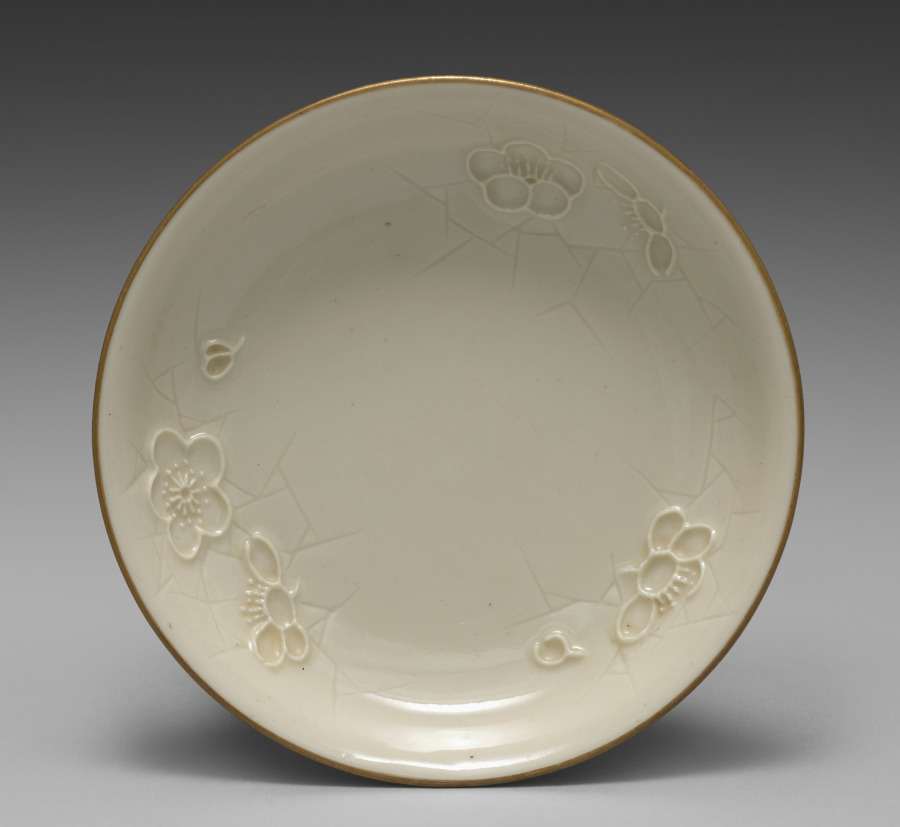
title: Small Dish from Dining Set with Plum Blossoms and Cracked-Ice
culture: Japan, Meiji period (1868–1912)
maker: Seifū Yohei II (Japanese, 1844–1878)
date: c. 1875–78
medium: Porcelain with molded designs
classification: Ceramic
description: Each item in this set has a delicate low-relief design of flowering plum branches over scattered, intersecting lines meant to resemble the cracked-ice surface of a frozen body of water and is signed on the base in gold pigment. While Yohei II produced many fine works in underglaze blue, like those produced by Kiyomizu Shichibei, he also made works in quite different styles later in his career, from the early 1870 s. In 1873, he was appointed purveyor to the Industrial Center of Kyoto Prefecture, a designation associated with Kyoto’s efforts to reach an international market through the port of Kobe; and from 1875 until his death, he was involved in national-level projects to present Japanese ceramics across the world. It was during this period that Yohei III was apprenticed to Yohei II, and it has been suggested that this set may in fact be an early example of Yohei III’s work, which he signed with his teacher’s name. Decorated with flowers resembling Japanese textile motifs, the set calls to mind the design of Yohei II’s pair of vases with plum blossoms in the Victoria and Albert Museum. Here, the elaborate trees created for a formal public exhibition setting have been translated into the approachable blossoms of the genteel domestic environment. While the designs are consistent across the pieces, each raised flower petal and pistil and each incised line in the ice was done by hand, so the cups, bowls, and dishes are similar yet unique. The bottoms of two boxes once identified the set’s owner, but the information has been deliberately obscured with black ink. However, inscriptions still visible appear to indicate two occasions, once at the end of July 1886 , and once again in June 1916 , when parts of the set were requested from Hokura in Niigata Prefecture. The location corresponds to a neighborhood in the present-day city of Jōetsu. The surname Tsuji 辻 also appears on a paper tag affixed to one of the box cloths. Future research may possibly reveal more about their provenance. A vase by Yohei III in a private collection combines the formal grandeur of the Yohei II vases in the Victoria and Albert Museum with the gentler design of this dining set, placing flowering plum trees against soft, scalloped-edge clouds resembling those in golden screens.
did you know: The dining wares have a creamy white coloration that the four boxes containing them identify as Korean in style.